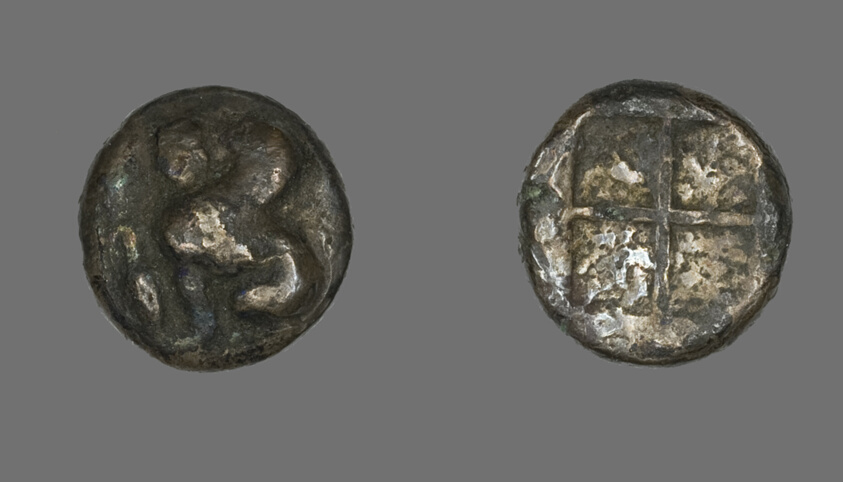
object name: Coin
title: Drachma (Coin) Depicting a Sphinx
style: greek, ancient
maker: Greek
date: 478-412 BCE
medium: Silver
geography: Greece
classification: coin; ancient art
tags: sphinxes